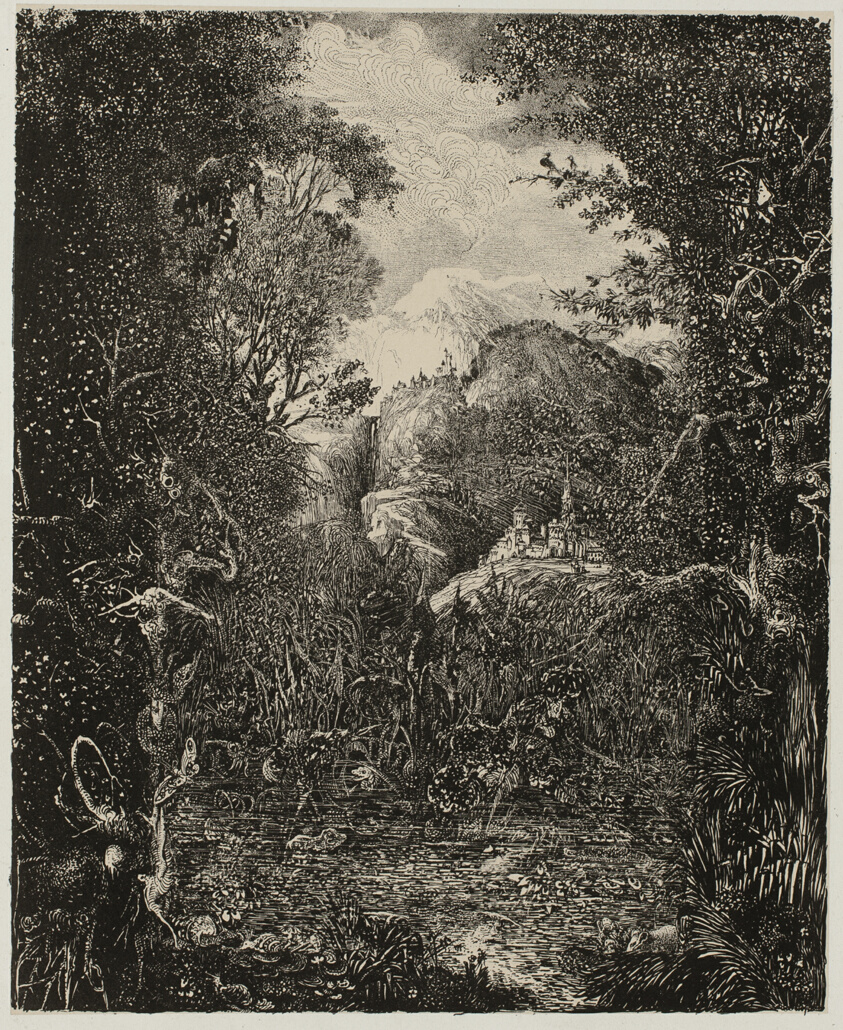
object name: Print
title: The Cities beyond the Marsh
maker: Rodolphe Bresdin (French, 1825-1885)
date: 1868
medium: Lithograph (etching transfer) on ivory China paper laid down on white wove paper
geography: France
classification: lithograph; print; prints and drawing